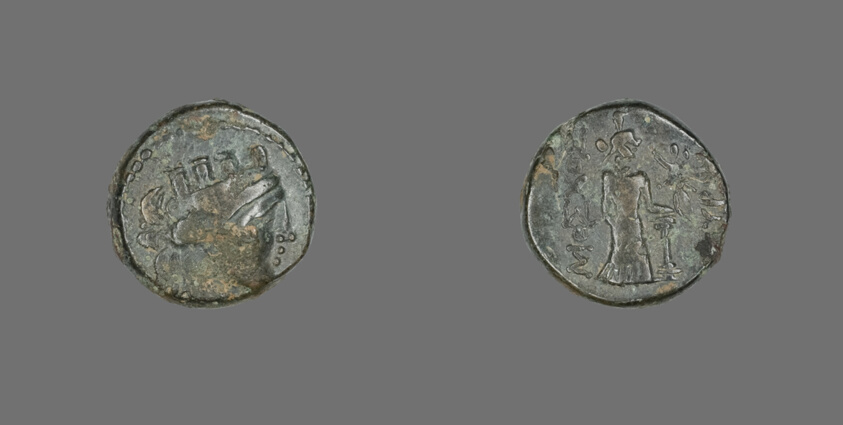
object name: Coin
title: Coin Depicting the Goddess Tyche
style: greek, ancient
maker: Greek; Smyrna, Ionia (now Izmir, Turkey)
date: 2nd-1st century BCE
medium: Bronze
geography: Ancient Greece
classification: coin; ancient art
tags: goddesses